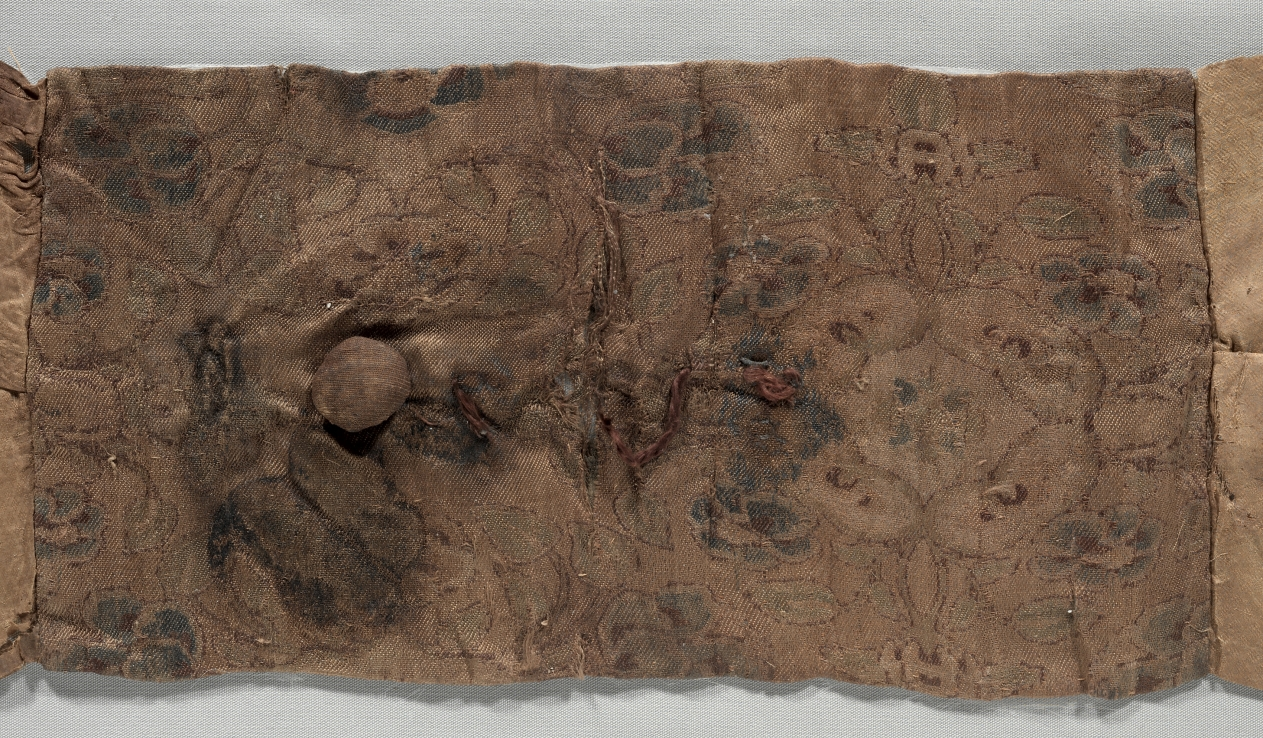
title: Silk Belt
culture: China, Liao dynasty (907-1125)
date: 907–1125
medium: compound twill weave, silk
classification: Textile